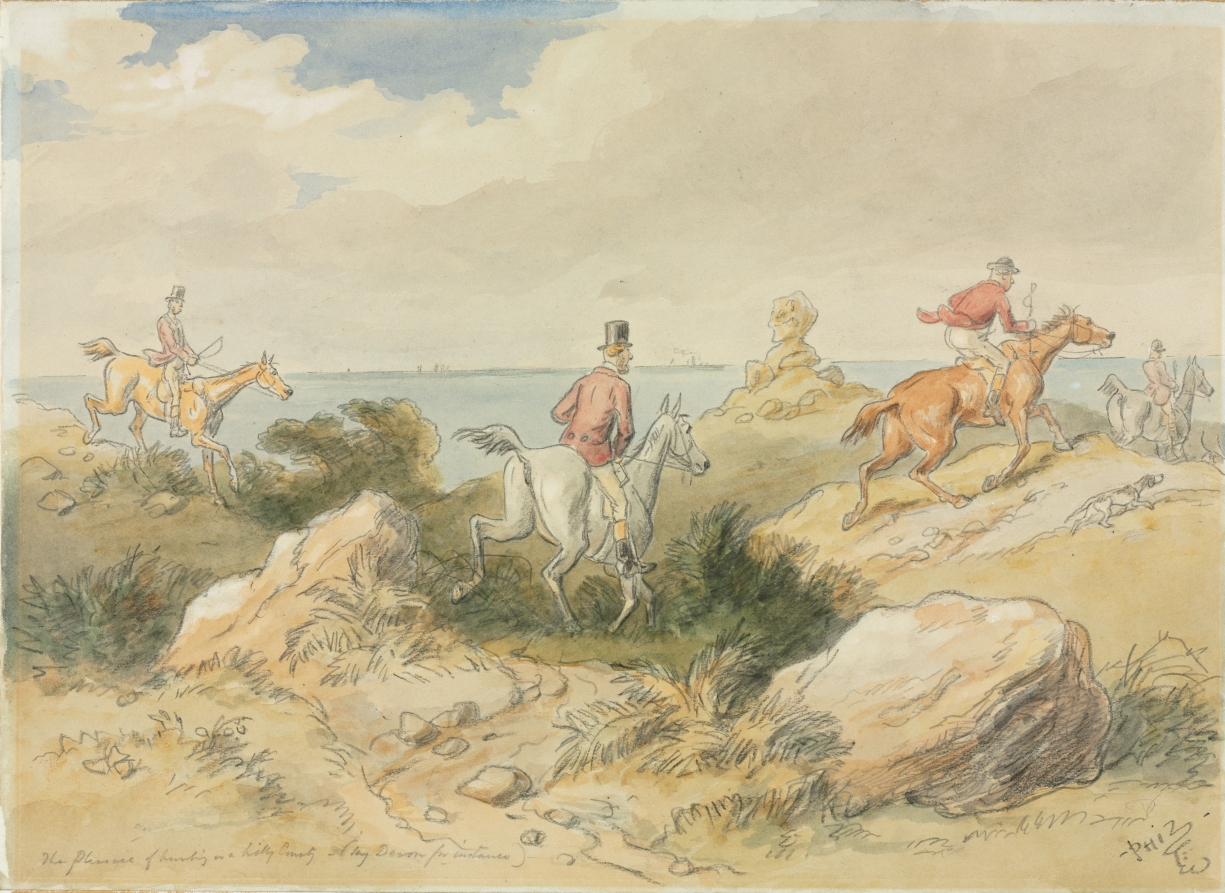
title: The Pleasures of Hunting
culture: England, 19th century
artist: Hablot Knight Browne (British, 1815–1882)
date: c. 1833–82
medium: black chalk and watercolor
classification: Drawing